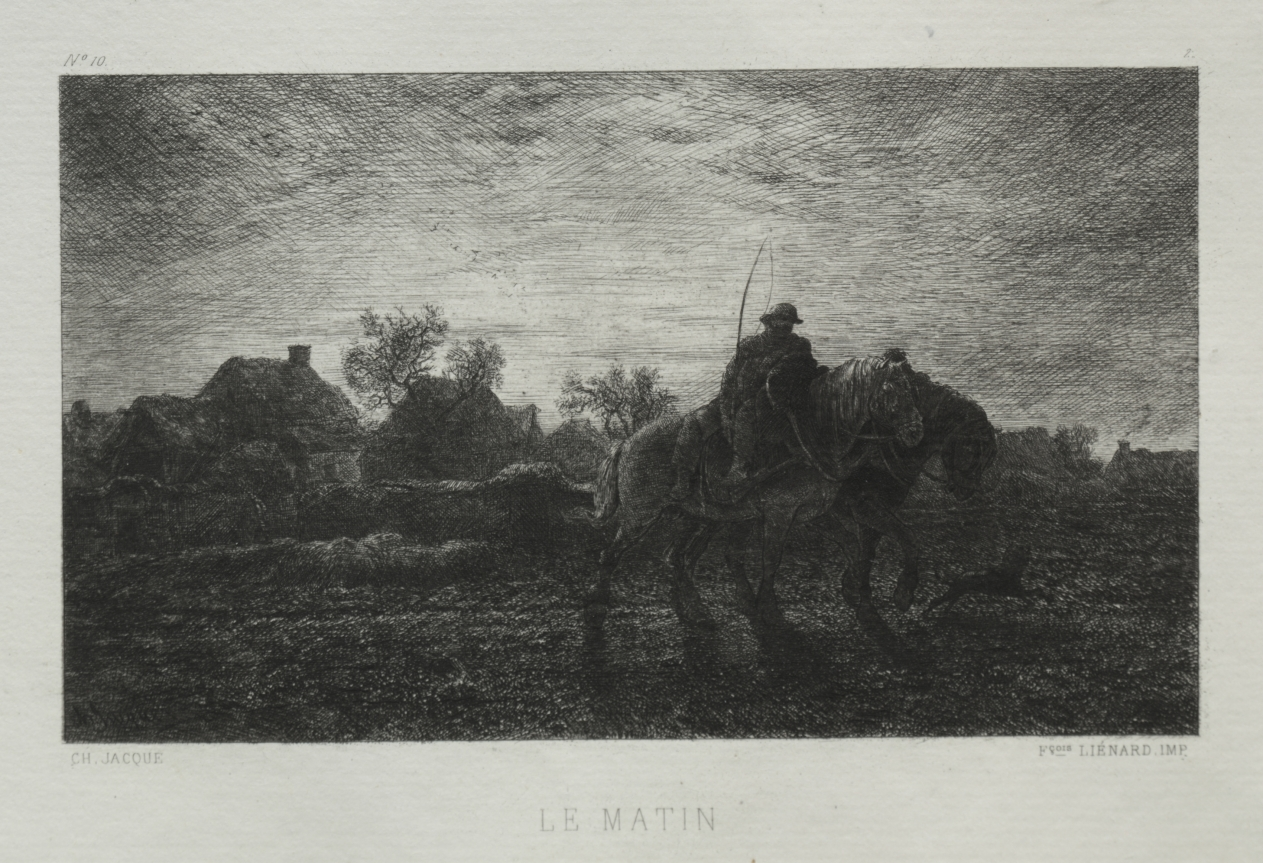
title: The Morning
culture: France, 19th century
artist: Charles-Émile Jacque (French, 1813–1894)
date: 1864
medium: etching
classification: Print